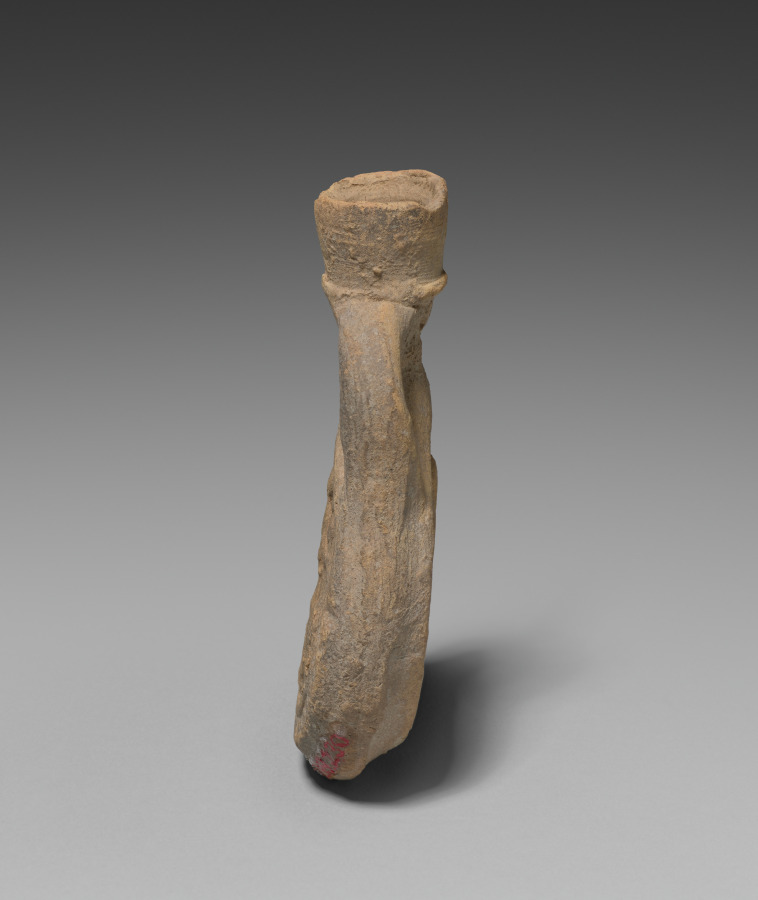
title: Pilgrim's Flask with Saint Menas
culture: Egypt, Coptic period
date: 400–600 CE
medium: terracotta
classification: Ceramic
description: These flasks bear the image of Saint Menas, an early martyr of the Christian Church whose shrine was in the desert southwest of Alexandria in Egypt. These flasks were probably used by pilgrims to hold oil taken from the lamp that burned over this saint's tomb. Probably manufactured near the shrine, pilgrim's flasks often bear decorations hinting at their place of origin, as is the case here.